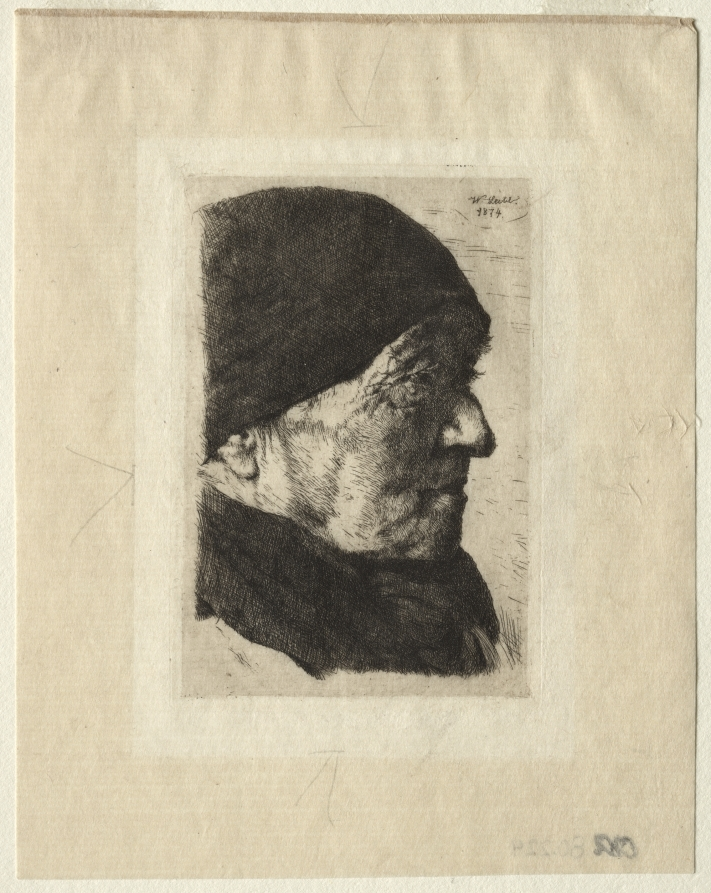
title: Head of a Peasant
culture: Germany, 19th century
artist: Wilhelm Maria Hubertus Leibl (German, 1844–1900)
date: 1874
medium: etching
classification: Print